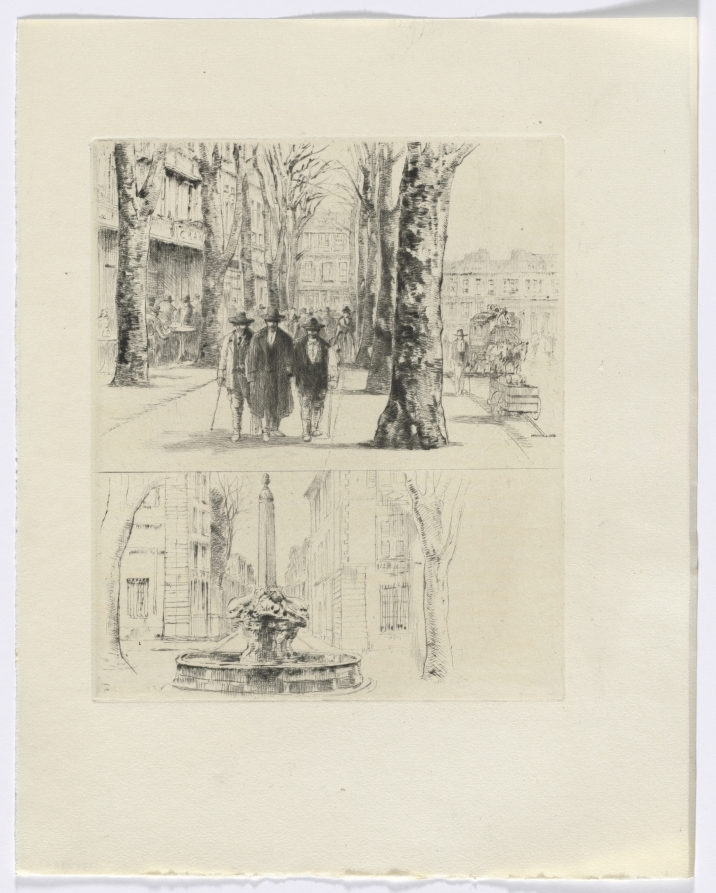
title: Frédéric Mistral: Mémoires et Recits by Frédéric Mistral: city street scene/ fountain (insert after p. 120)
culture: France, 20th century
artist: Auguste Brouet (French, 1872–1941)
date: 1937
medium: etchings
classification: Portfolio